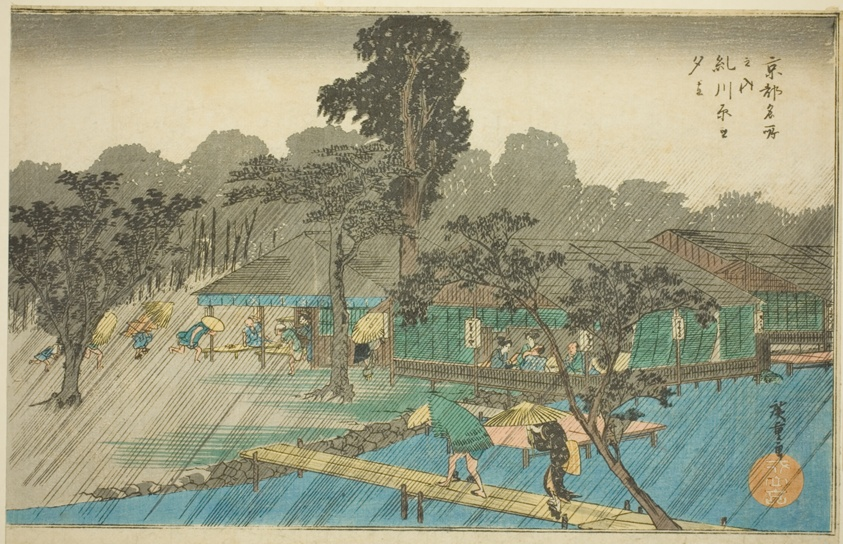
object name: Print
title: Evening Shower at the Bank of Tadasu River (Tadasugawara no yudachi), from the series "Famous Places in Kyoto (Kyoto meisho no uchi)"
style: Japanese (culture or style)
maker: Utagawa Hiroshige 歌川 広重; Japanese, 1797-1858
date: c. 1834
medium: Color woodblock print; oban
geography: Japan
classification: woodblock print; print; asian art